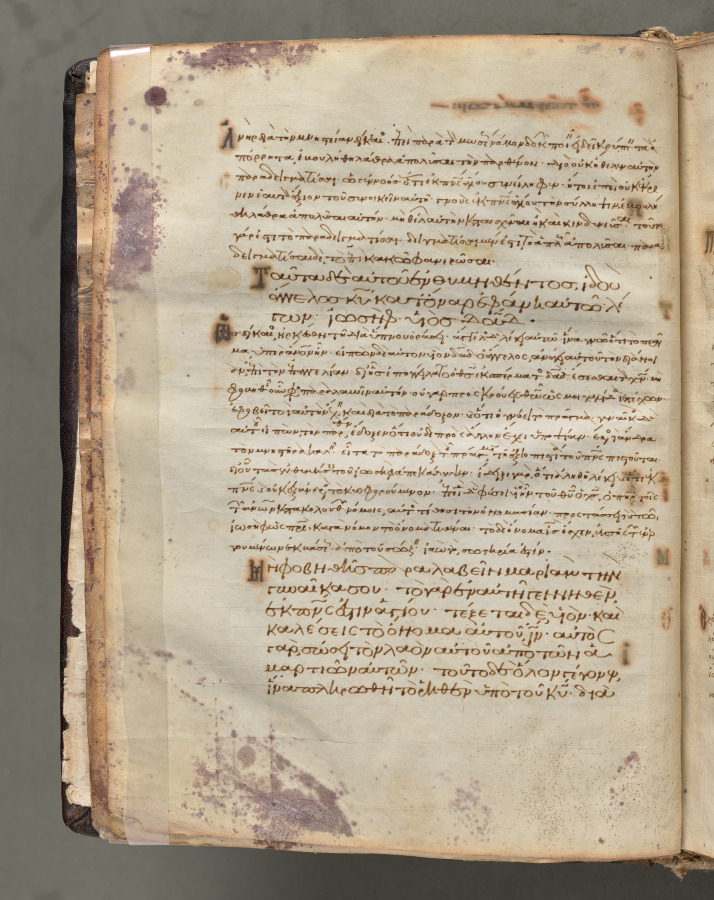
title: Text, folio 8 (verso), from a Gospel Book with Commentaries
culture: Byzantium, Constantinople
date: c. 1000–1100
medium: ink, tempera, and gold on vellum; leather binding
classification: Bound Volume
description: Each of the four gospels in this book opens on a page with brilliantly illuminated borders depicting the author of the text as well as birds-principally peacocks, symbols of the immortality of the soul-and fountains, representing the fountain of life and the salvation of the soul. This volume consists of 428 leaves with texts in Greek. Its level of sophistication suggests that it was probably written and decorated in a monastery in Constantinople.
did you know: Gospel Books were carried in procession through Byzantine churches.